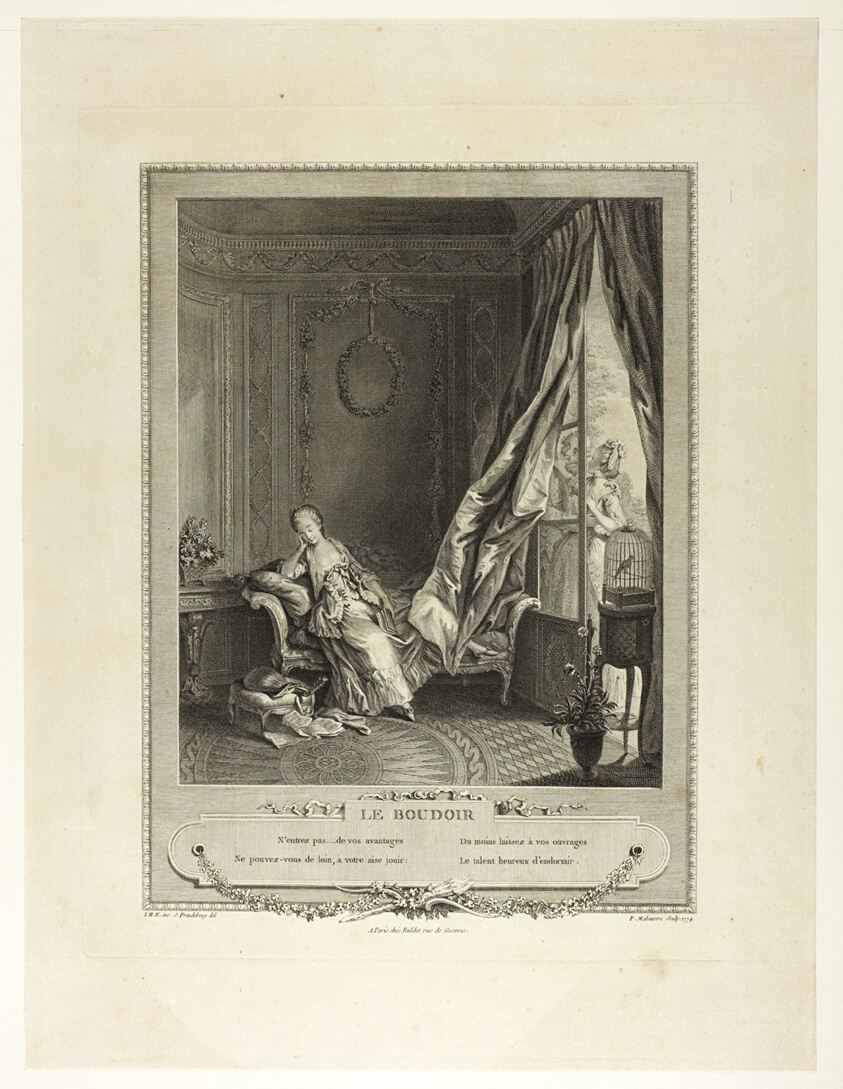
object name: Print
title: The Boudoir, from Monument du Costume Physique et Moral de la fin du Dix-huitième siècle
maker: Pierre Maleuvre (French, 1740-1803); after Sigmund Freudeberg (Swiss, 1745-1801) and Jean Henri Eberts (Swiss, 18th century); published by Laurent-François Prault (French 1712-1780)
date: 1774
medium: Engraving on ivory laid paper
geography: France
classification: etching; print; prints and drawing